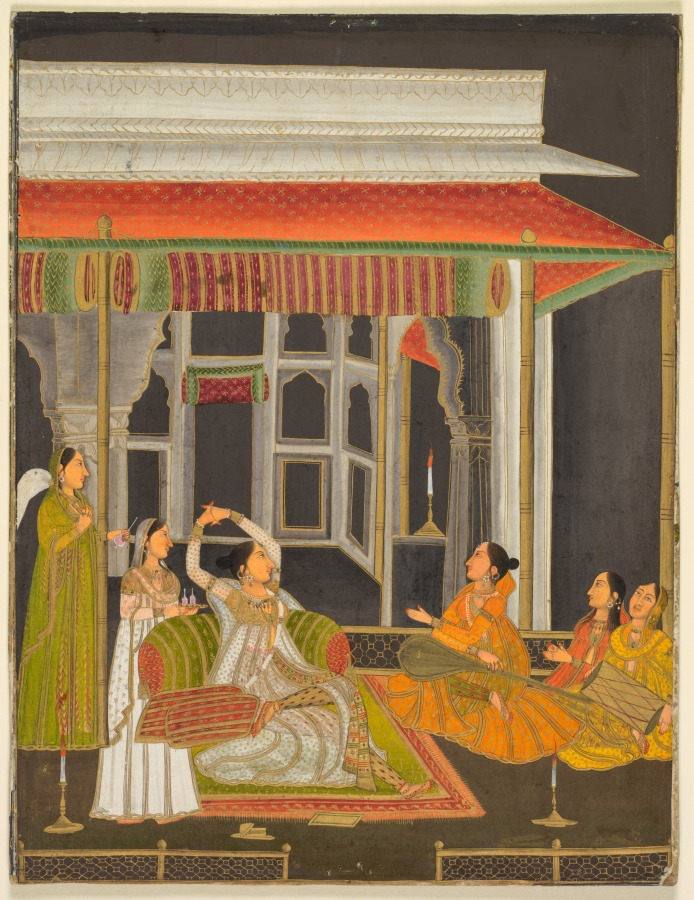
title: A Princess on a Terrace with Attendants at Night (recto)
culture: India, Farrukhabad, Mughal, 18th century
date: c. 1760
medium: Gum tempera and gold on paper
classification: Painting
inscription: verso: six lines of Persian poetry in nast 'aliq calligraphy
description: Before a terrace pavilion in the women’s quarters of a palace, a royal woman stretches to show off her figure in accordance with age-old Indian poetic imagery. Female musicians provide entertainment, and attendants hold bottles of wine at the ready. Scenes of enjoyment in sumptuous domestic spaces pervaded the artistic repertoire of the imperial court and regional centers of northern India throughout the late 1700s, following the themes set by the Mughal emperor Muhammad Shah.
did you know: Rolled-up textiles could be let down to enclose the space of an open pavilion.